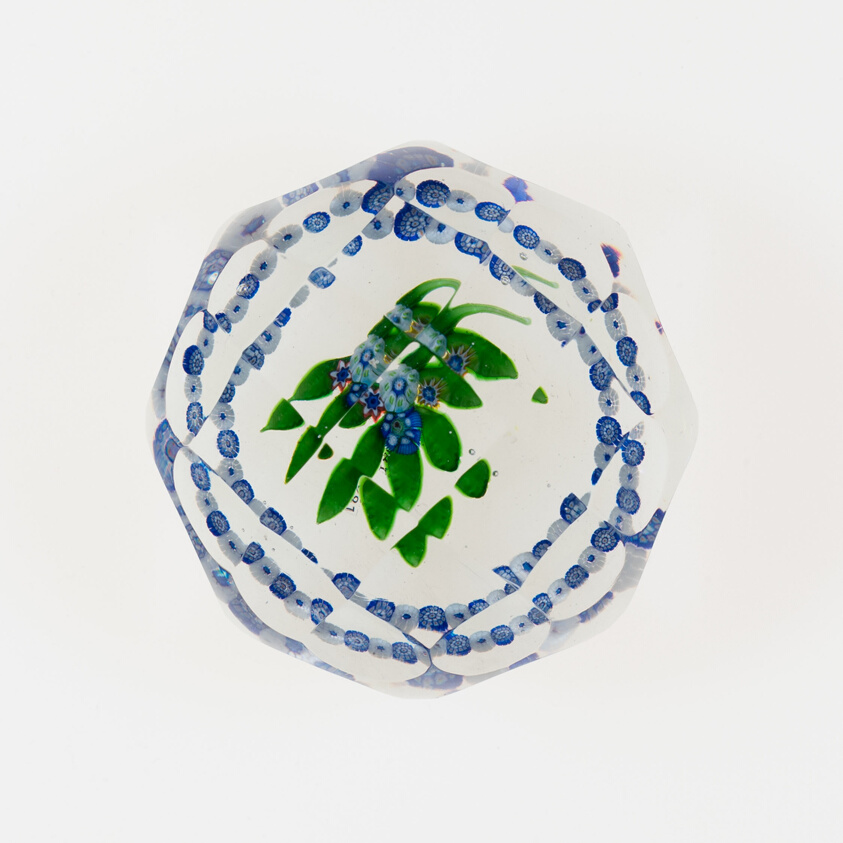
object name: Glass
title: Paperweight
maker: Saint-Louis Glassworks (Cristalleries de Saint-Louis); Lorraine, France, founded 1586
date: c. 1848–55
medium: Glass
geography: Saint-Louis-lès-Bitche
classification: paperweight; lampwork; european decorative arts; glass